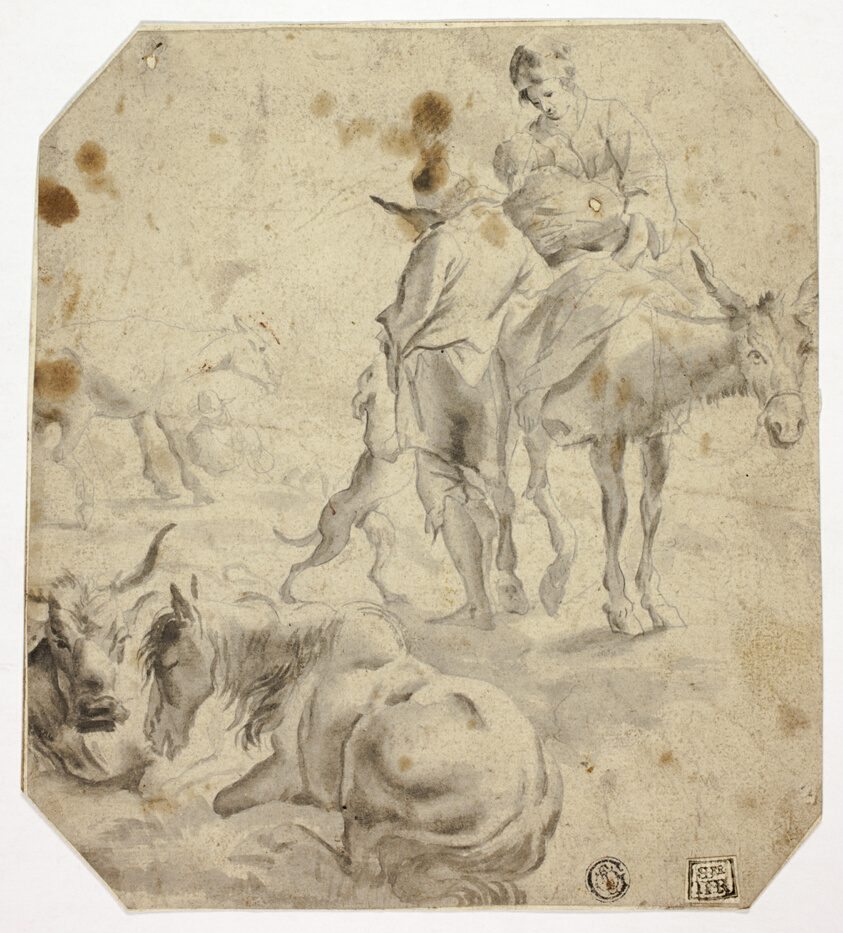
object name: Drawing and Watercolor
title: Woman and Child on Donkey, Man, Dogs, Horses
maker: After Nicolaes Berchem; Dutch, 1620-1683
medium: Pen and brown ink, with brush and gray wash, over graphite, on buff laid paper, laid down on cream laid paper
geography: Holland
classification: ink or chalk wash; drawings (visual works); prints and drawing